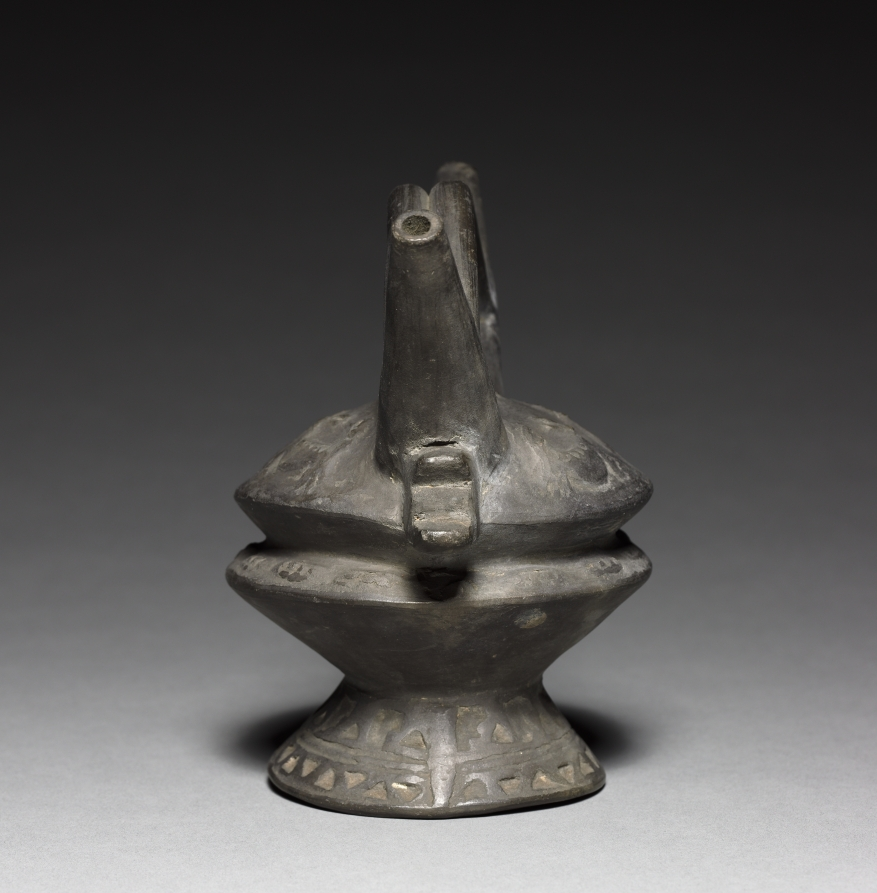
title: Vessel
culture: Peru, Chimú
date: 1300–1400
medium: black ware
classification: Ceramic